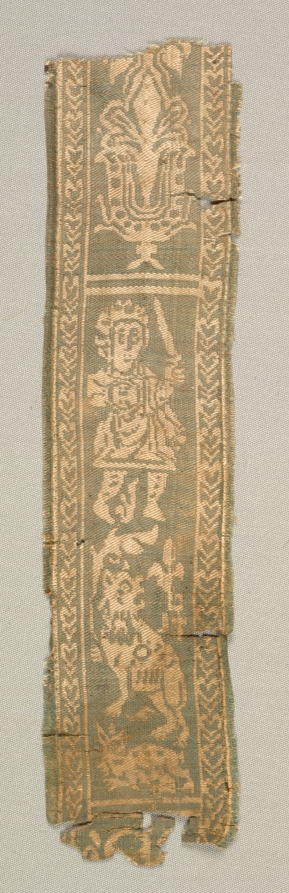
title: Silk Decorative Tunic Band with a Hunter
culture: Egypt or Syria, Umayyad period (661–750) or Abbasid period (750–1258)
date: 700s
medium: Silk: complementary weft-faced twill with inner warps (samit)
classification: Textile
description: This prestigious silk band displays a stylized palmette leaf above a hunter who holds a sword and a shield and pursues a lion and a rabbit. Another fragment with Arabic script indicates Islamic manufacture. Green and ivory silk wefts (horizontal threads) dominate, interlaced by warps (vertical threads) in a diagonal twill weave. A second inner warp does not come to the surface. Such compound structures were woven on large looms with automatic pattern repetition, called drawlooms.